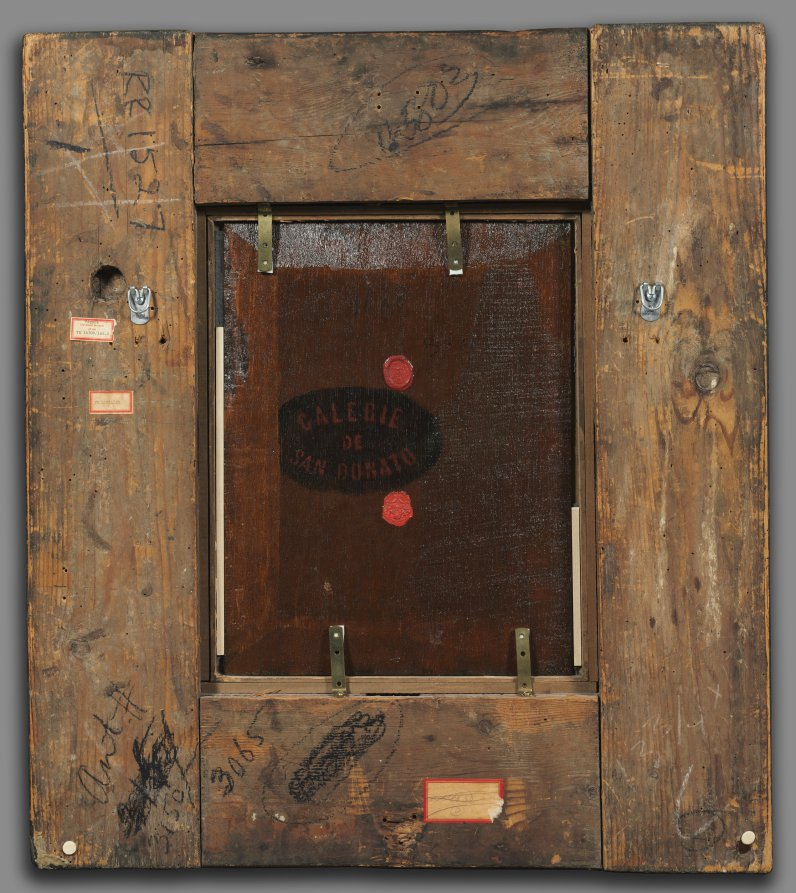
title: Portrait of a Woman with a Dog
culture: Netherlands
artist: Hendrik Gerritsz. Pot (Dutch, c. 1585–1657)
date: c. 1635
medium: oil on wood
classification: Painting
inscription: A painted dark oval appears on the reverse of the panel with the words "Galerie de San Donato," in light red paint. Another inscription can be seen (especially with IR) underneath the logo: "ripristinato da, Mno Luperini, nel 1875" (restored by Mr. Luperini in 1875).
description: The unidentified sitter wears rich black fabric and a brown fur stole, a sheer white linen cap covers her head, an elaborate starched ruff rings her neck, her sleeves finish in punto in aria lace, and a prominent gold ring with a jewel appears on her right hand. The composition, weighted heavily to the right, implies a pendant portrait, yet to identified, probably depicting her husband.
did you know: The wooden box on the floor would have held a dish of glowing coals: an early space heater!